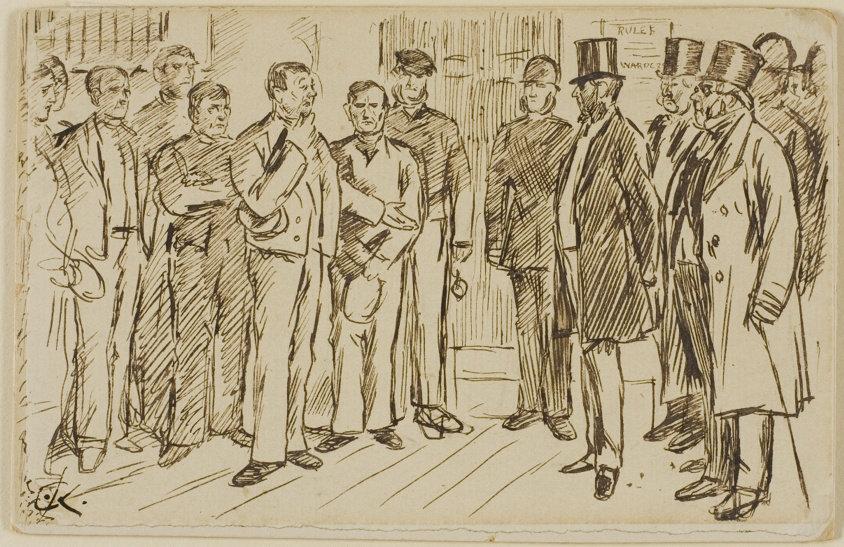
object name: Drawing and Watercolor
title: Identification of Prisoner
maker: Charles Samuel Keene (British, 1823-1891)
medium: Pen and brown ink on tan laid paper, laid down on board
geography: England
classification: pen and ink drawings; drawings (visual works); prints and drawing